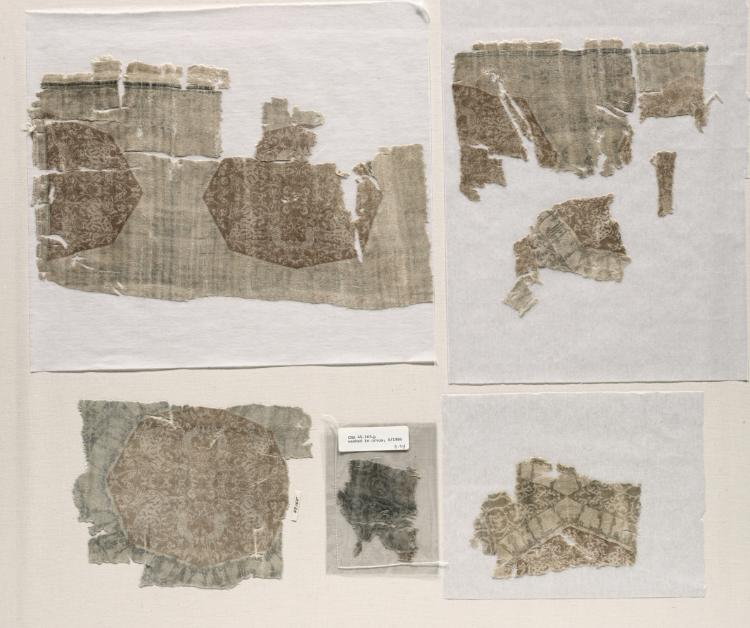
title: Fragment with Octagons and Four-Pointed Stars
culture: Iran or Iraq, in the style of the Seljuq period (1037–1194)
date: before 1949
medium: Silk: lampas weave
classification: Textile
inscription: inni la-'a'lamu wal-layl janan anna al-jannah fi arja' difafihi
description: The design consists of aligned large-scale octagons and four-pointed star-shaped interspaces filled with leafy scrolls. Each octagon encloses pairs of regardant gazelles and non-regardant rabbits in mirror image against a foliate background, patterned in white on a light pinkish-tan ground. Framing the octagon is a Kufic inscription repeated in orthograde and retrograde around the central design.